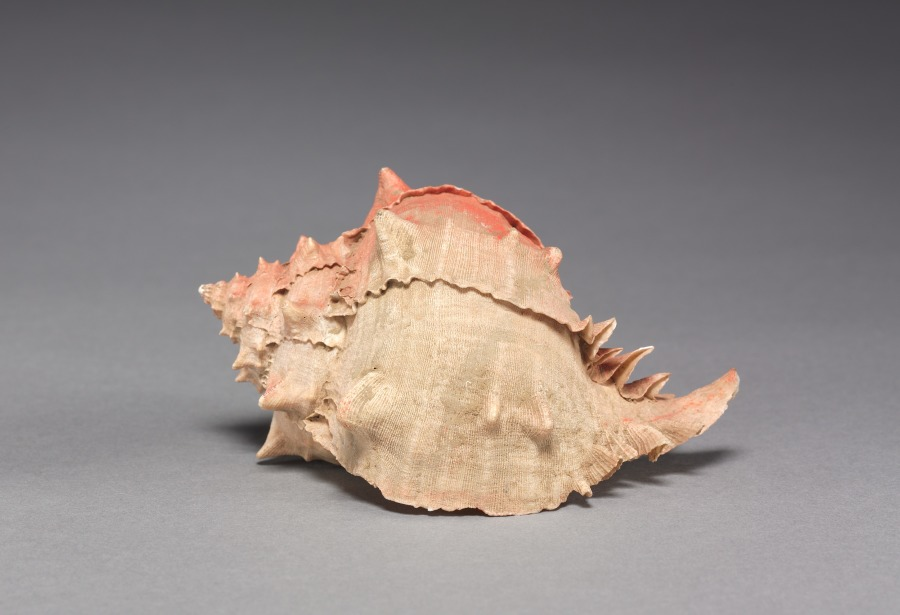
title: Offering Group: Large Shell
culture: Mexico, Guerrero(?), San Jerónimo de Juárez, Xochicalco style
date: c. 800–1200(?)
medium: shell, red pigment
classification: Sculpture